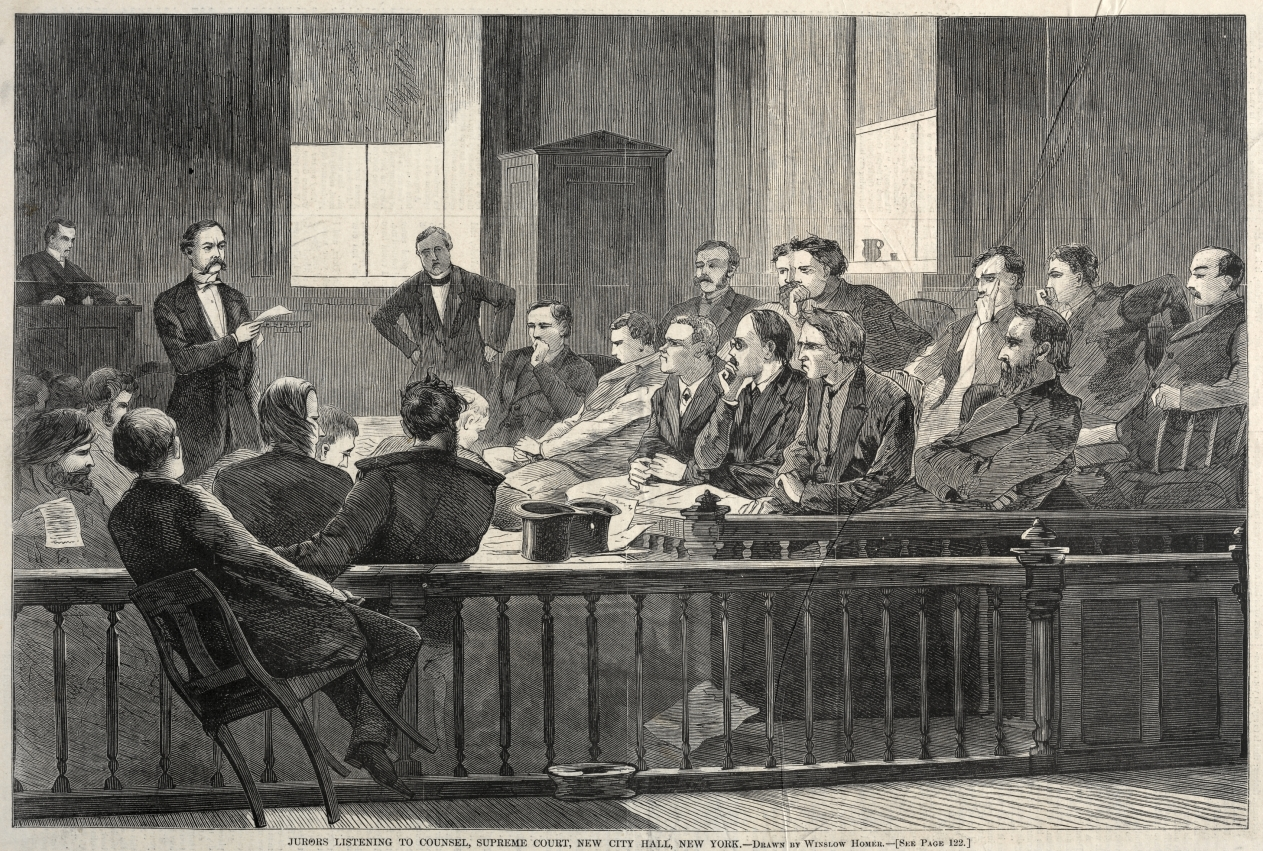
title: Jurors Listening to Counsel, Supreme Court, New City Hall, New York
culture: America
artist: Winslow Homer (American, 1836–1910)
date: 1869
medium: wood engraving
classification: Print